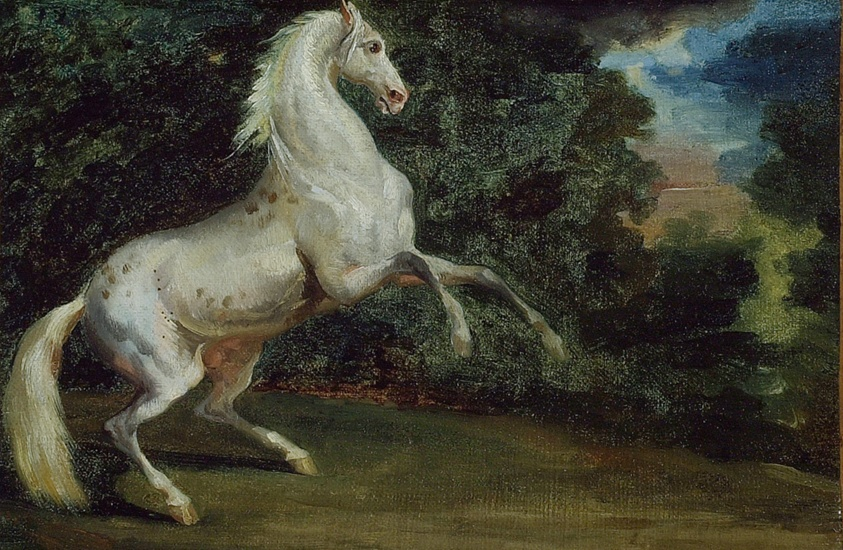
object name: Painting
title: Prancing Horse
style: nineteenth century, 19th century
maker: Follower of Jean Louis André Théodore Géricault (French, 1791–1824)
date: 1808/12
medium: Oil on canvas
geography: France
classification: oil on canvas; france; french; oil paintings (visual works); paint; painting; european painting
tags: horse, field, trees, landscape, animals, horses